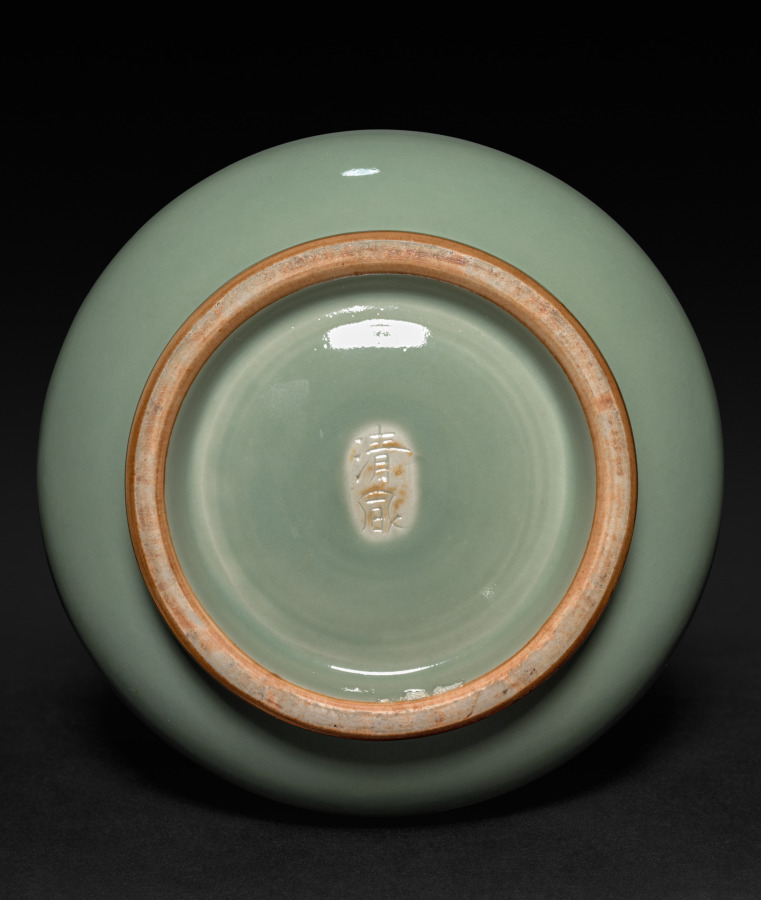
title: Vase with Bamboo Joints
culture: Japan, Taishō period (1912–26)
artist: Seifū Yohei IV (Japanese, 1872–1951)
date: 1914–46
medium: Porcelain with green glaze and molded design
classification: Ceramic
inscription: 清風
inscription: 清風造【印】清風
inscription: 成山清風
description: Yohei IV’s Vase with Bamboo Joints has a shape often seen in pairs of bronze flower vases placed to either side of Buddhist altars before sculptural icons. While the term hisoku (Chinese mise 秘色), or “mysterious color” glazing, indicates a more specific green color than seiji 青磁, a more general word for green-glazed porcelain, there is still some range in the actual color of the glaze.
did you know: Many ceramics created by the Seifū Studio refer to and emulate Chinese ceramics in form and glazing.